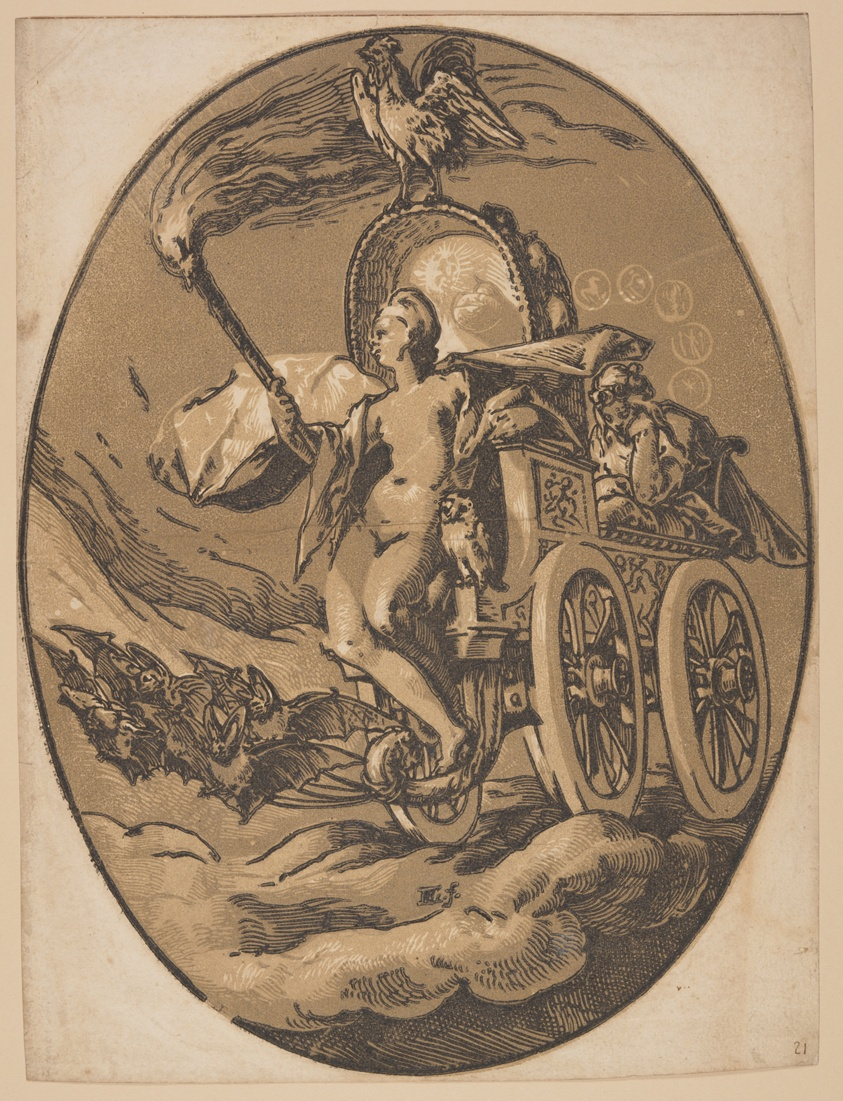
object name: Print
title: Nox, from The Deities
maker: Hendrick Goltzius (Dutch, 1558–1617)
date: 1588/90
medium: Chiaroscuro woodcut from three blocks in two shades of beige-gray on ivory laid paper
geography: Netherlands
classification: print; paper; prints and drawing; woodcut